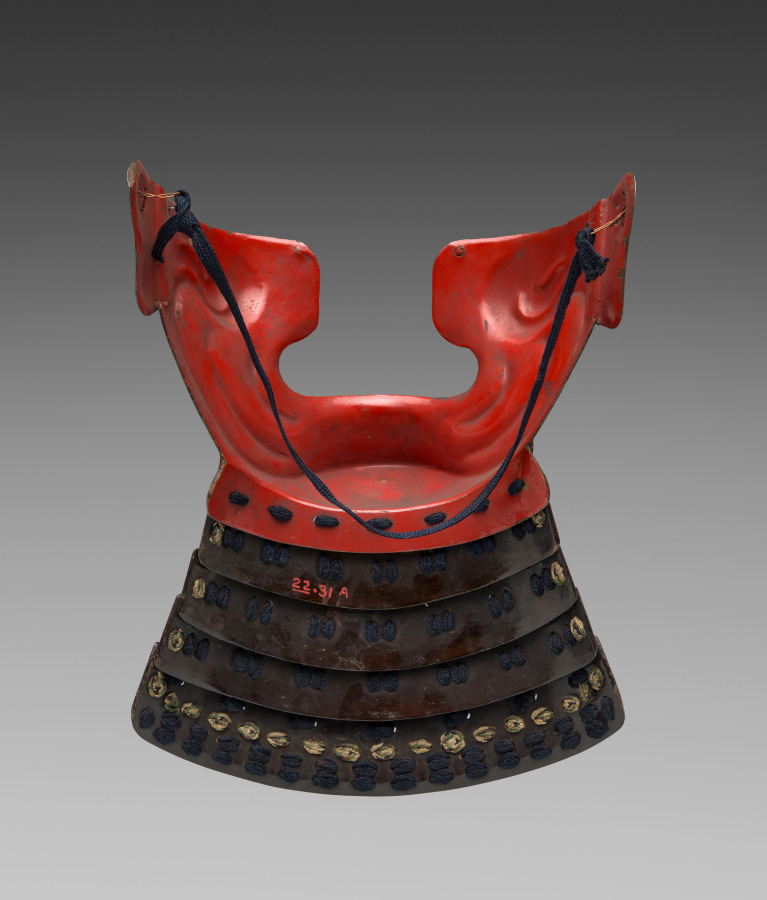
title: Half-mask (Ho'o-ate) with Neck Guard (Nodowa)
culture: Japan, Edo period (1615–1868)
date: 1615–1868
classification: Arms and Armor